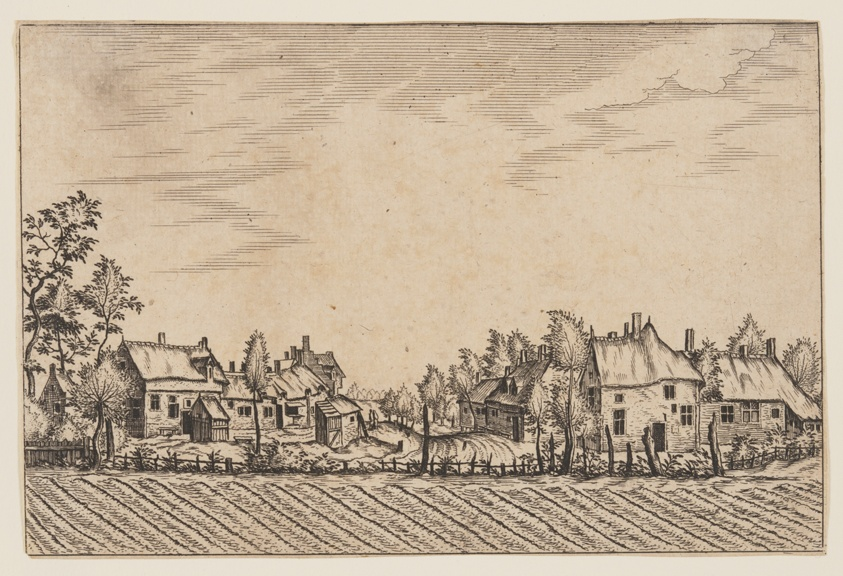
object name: Print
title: Farms, Ploughed Field in the Foreground, from Master of the Small Landscape Series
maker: Johannes van Doetecum (Netherlandish, 1528/32–1605) and Lucas Doetecum (Dutch, died before 1584); after the Master of the Small Landscapes (Flemish, active 1555-1600)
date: c. 1560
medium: Engraving on ivory laid paper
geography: Netherlands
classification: engraving; paper; print; prints and drawing